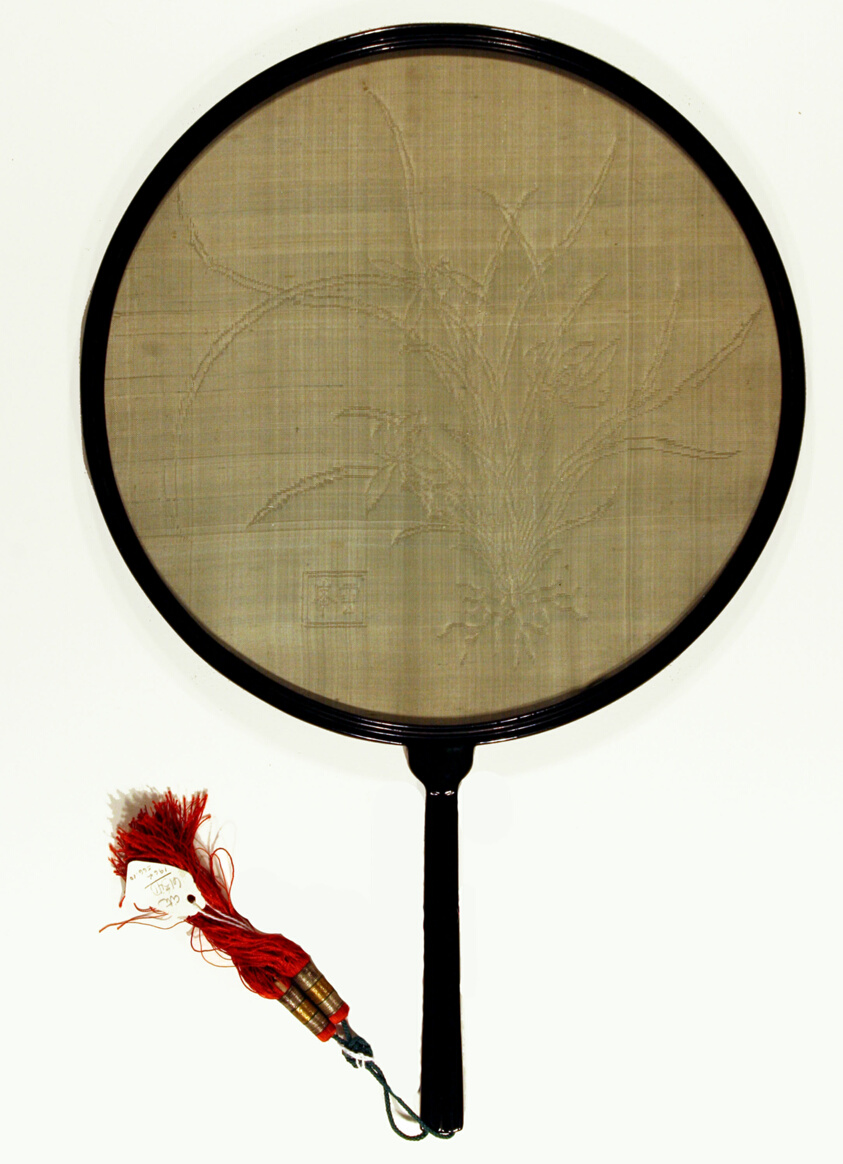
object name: Costume and Accessories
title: Narcissus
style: Chinese (culture or style)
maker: China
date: Qing dynasty (1644–1911), late 19th century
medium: Fan (round); openwork gauze, lacquered wood handle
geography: China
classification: fan; accessories (object genre); asian art; costume